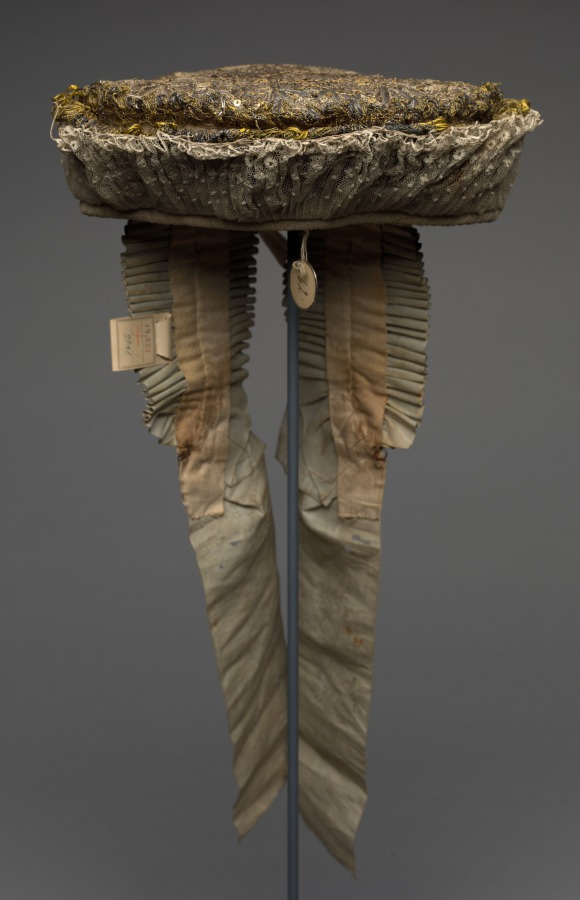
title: Embroidered Headdress (Called "Triesische")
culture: Germany, 18th century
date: 1700s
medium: embroidery, metallic thread and spangles; lace edging and ribbon streamers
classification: Garment